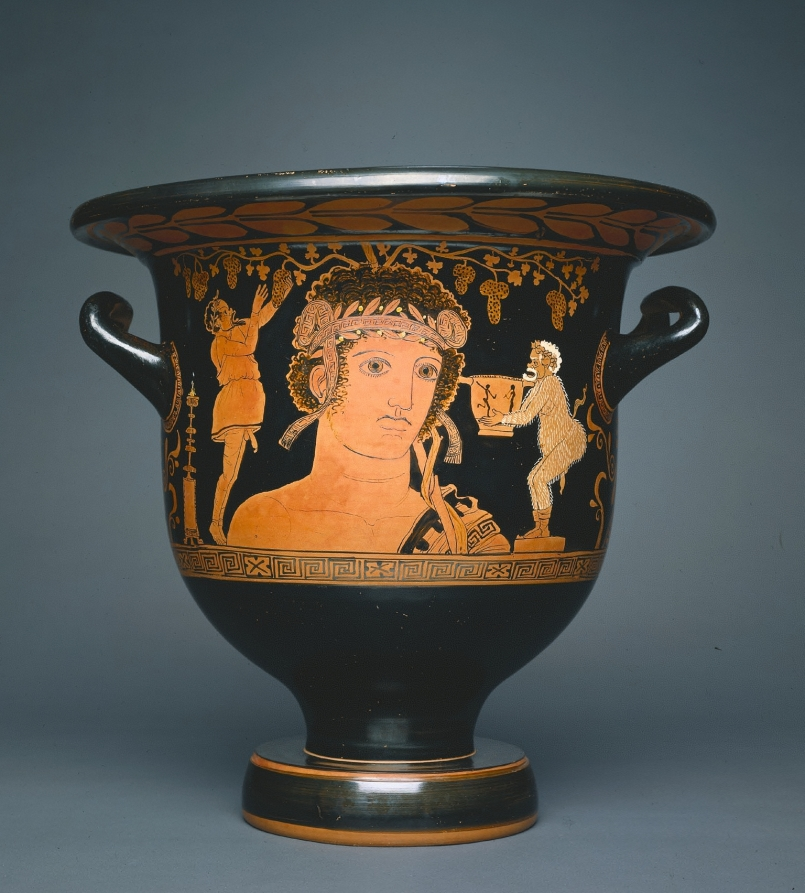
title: Red-Figure Bell-Krater (Mixing Vessel): Bust of Dionysos and Comic Actors (A); Dionysos, Satyr, Maenad (B)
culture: South Italian, Apulian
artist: attributed to Choregos Painter (South Italian, Apulian, active c. 390–380 BCE)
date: c. 390–380 BCE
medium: ceramic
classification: Ceramic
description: Dionysos, the god of wine, theater, and the mysteries, dominates both sides of this bell-krater, a vessel for mixing water and wine. On the front, he appears in bust form, wearing a fillet and laurel wreath. Over his shoulder and behind his head rests his thyrsos, sprouting grapevines. Comic actors, identifiable by their masks and padded costumes, flank the colossal bust, stretching for a bunch of grapes on the left and holding a large skyphos (wine cup) on the right. On the reverse, Dionysos marches in procession with his retinue, a satyr and maenad.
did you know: The large bust of Dionysos may represent a stage prop or symbolize the multifaceted god.